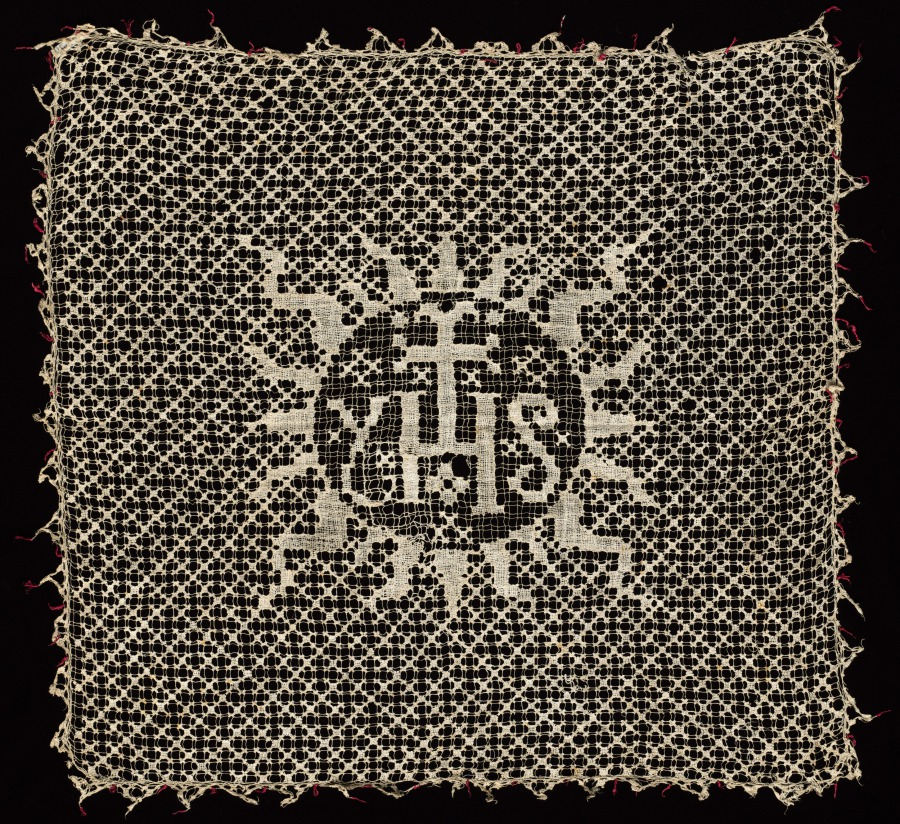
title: Chalice Veil with Monogram of Christ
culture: Italy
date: 1500s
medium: Bleached linen(?): needle lace (mezza mandolina) with red silk thread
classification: Lace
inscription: "I H S" in center.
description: This piece has been identified as a veil used to cover the chalice that holds the wine until the moment of communion in a Catholic Mass. The central monogram (IHS) abbreviates the name of Christ in Greek, surrounded by a circle of rays that indicate a holy symbol. The technique is of needle lace, knotted in an irregular pattern (mezza mandolina) and darned in two directions.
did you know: The monogram for Christ derives from the first three letters in his name in Greek – ΙΗΣΟΥΣ. The Greek letter Σ (sigma) is written as an “S” in English.